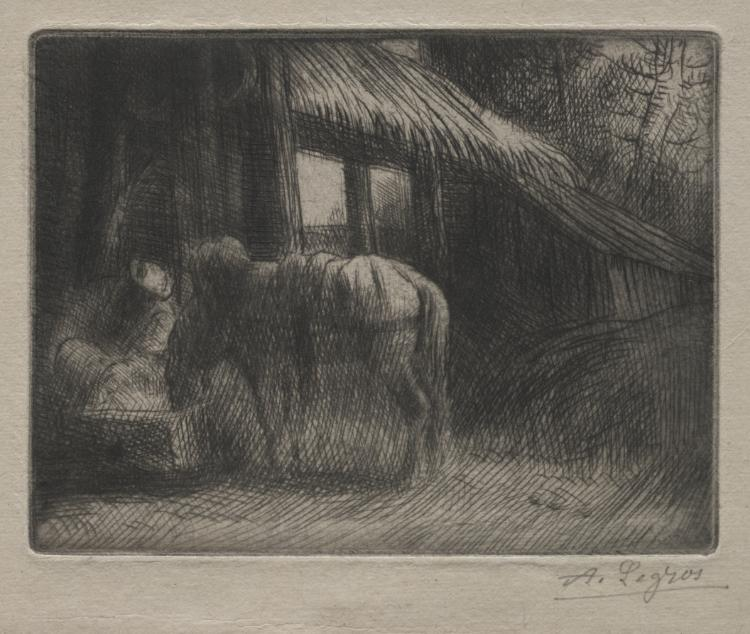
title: The Watering Place (2nd Plate)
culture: France, 19th-20th century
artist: Alphonse Legros (French, 1837–1911)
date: c. 1857–1911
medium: etching and drypoint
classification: Print